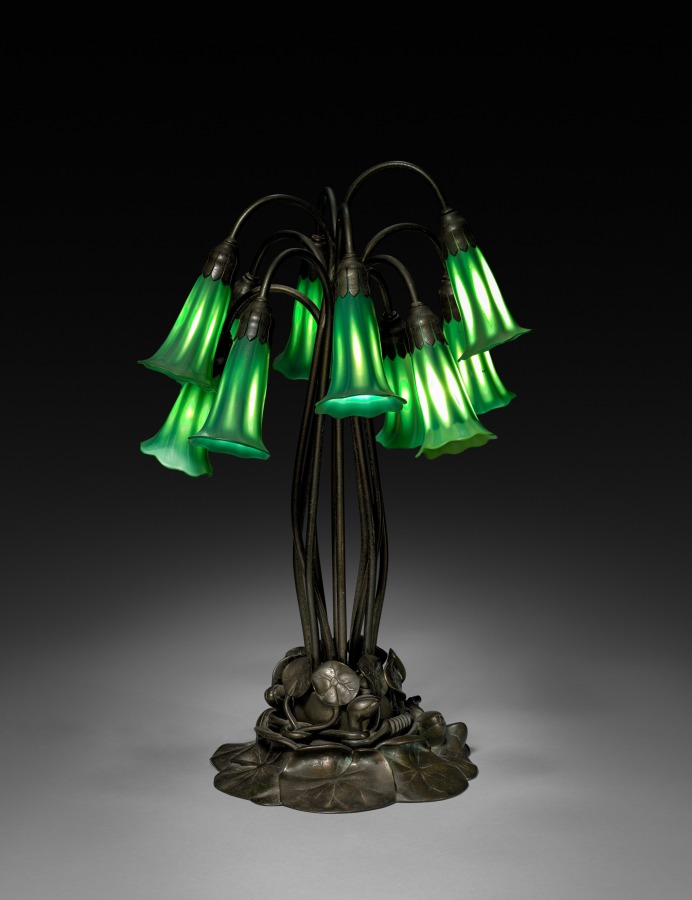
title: Pond Lily Table Lamp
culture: America, New York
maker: Tiffany Studios (United States, New York, 1902–32)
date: c. 1902–10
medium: Favrile glass, bronze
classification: Lamp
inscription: Shades etched: L.C.T.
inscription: stamped on bottom: Tiffany Studios/New York/3(?)8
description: The dawn of the 20th century spurred fresh approaches to design. Louis Comfort Tiffany’s great contribution to this new art movement, termed the Art Nouveau, was not only the shimmering iridescence of his Favrile glass but also the naturalistic compositions of his lamps and windows, which brought him commercial and critical success in both Europe and America. Symbolic themes, such as this lamp's dark blooms of the pond lily in a swampy landscape, became a hallmark of Tiffany's Art Nouveau design. It won a grand prize for Tiffany Studios at the 1902 international exposition in Turin, Italy.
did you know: The dawn of electricity made this lamp possible, transforming a work of sculpture into a useful object.